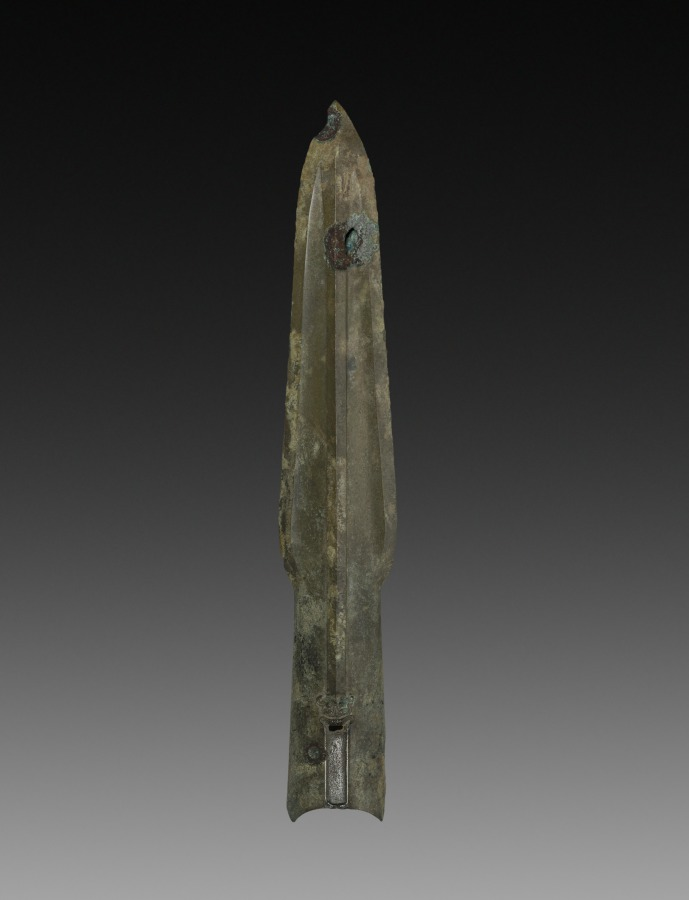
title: Spear Point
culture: China, Zhou dynasty (c. 1046–256 BCE)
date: 1045–256 BCE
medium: bronze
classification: Arms and Armor